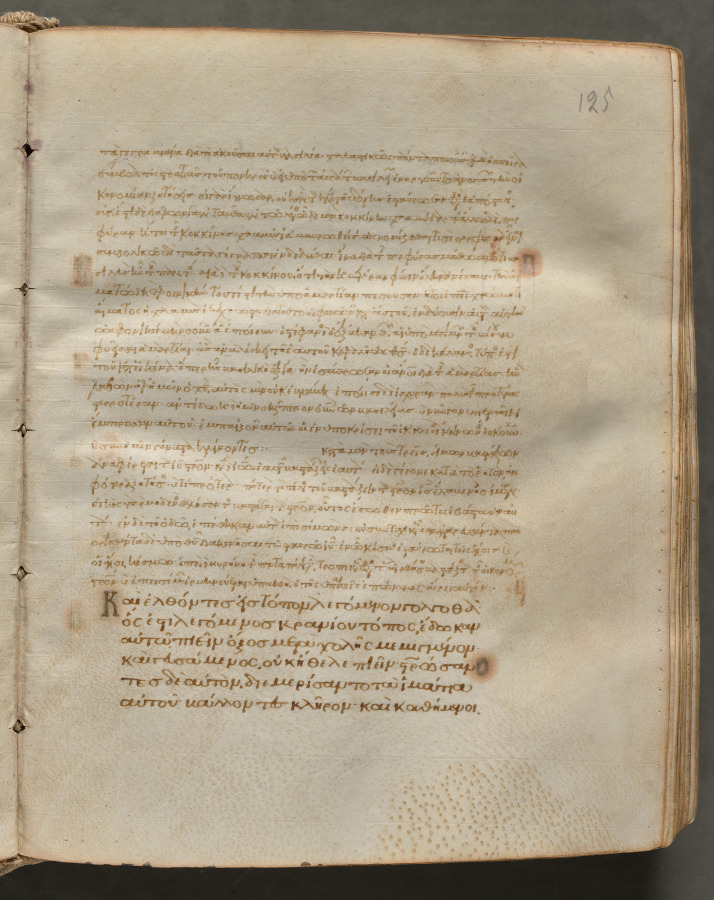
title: Text, folio 125 (recto), from a Gospel Book with Commentaries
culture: Byzantium, Constantinople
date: c. 1000–1100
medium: ink, tempera, and gold on vellum; leather binding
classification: Bound Volume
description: Each of the four gospels in this book opens on a page with brilliantly illuminated borders depicting the author of the text as well as birds-principally peacocks, symbols of the immortality of the soul-and fountains, representing the fountain of life and the salvation of the soul. This volume consists of 428 leaves with texts in Greek. Its level of sophistication suggests that it was probably written and decorated in a monastery in Constantinople.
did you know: Gospel Books were carried in procession through Byzantine churches.